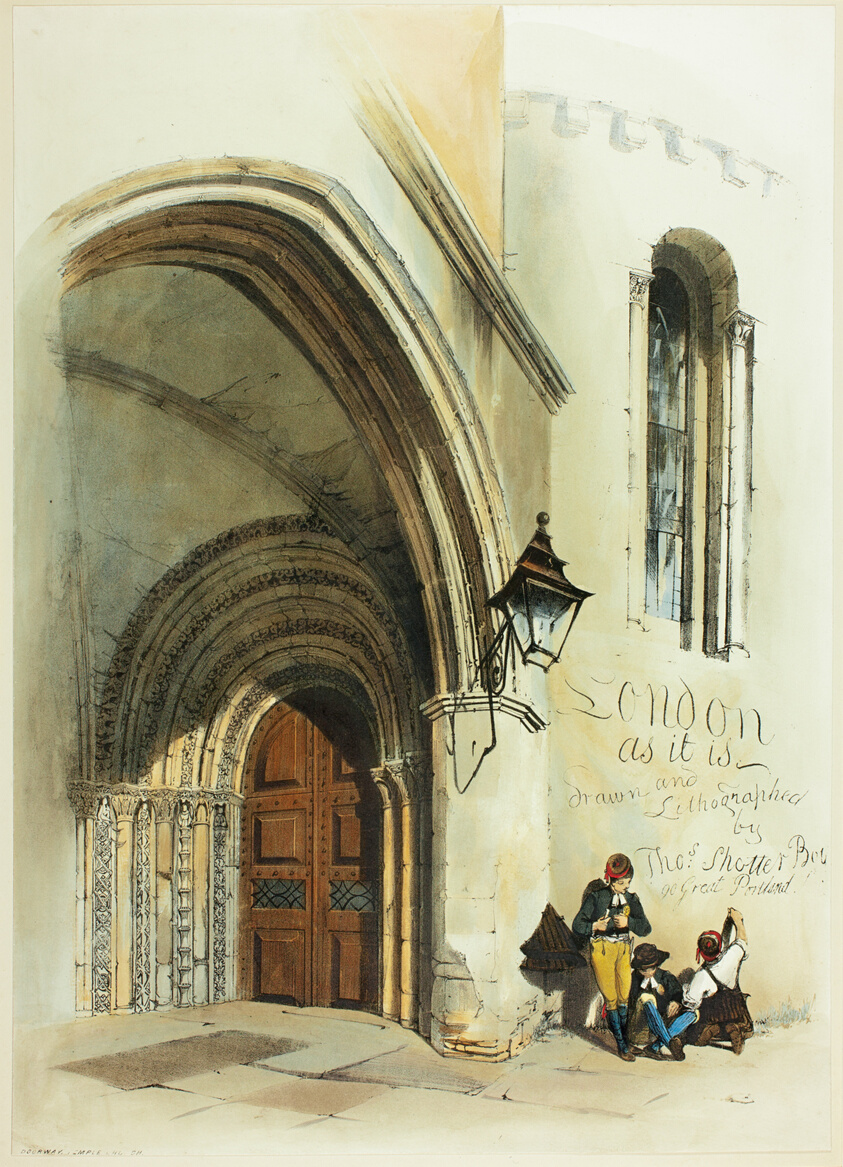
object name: Print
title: Doorway, Temple, frontispiece to Original Views of London as It Is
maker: Thomas Shotter Boys (English, 1803-1874); designed by Charles Ollier (English, 1788-1859)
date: 1842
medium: Hand-colored lithograph on paper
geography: England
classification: lithograph; print; prints and drawing